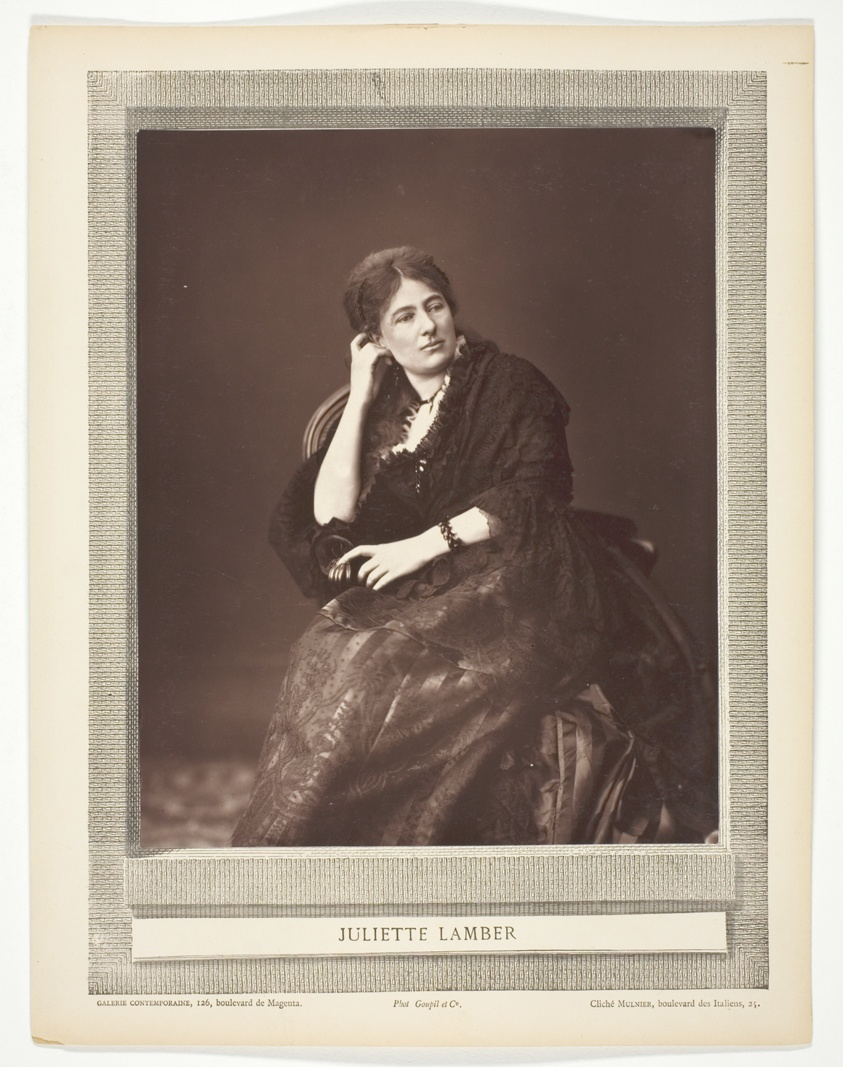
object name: Photograph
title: Juliette Lamber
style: 19th century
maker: Ferdinand J. Mulnier (French, active 1860–1890)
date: c. 1876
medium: Woodburytype, from the periodical “Galerie Contemporaine Littéraire, Artistique” (1877), volume 4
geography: France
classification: woodburytype; photomechanical process; photography; photograph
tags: Collected by Hugh Edwards, Contemporaine Littéraire